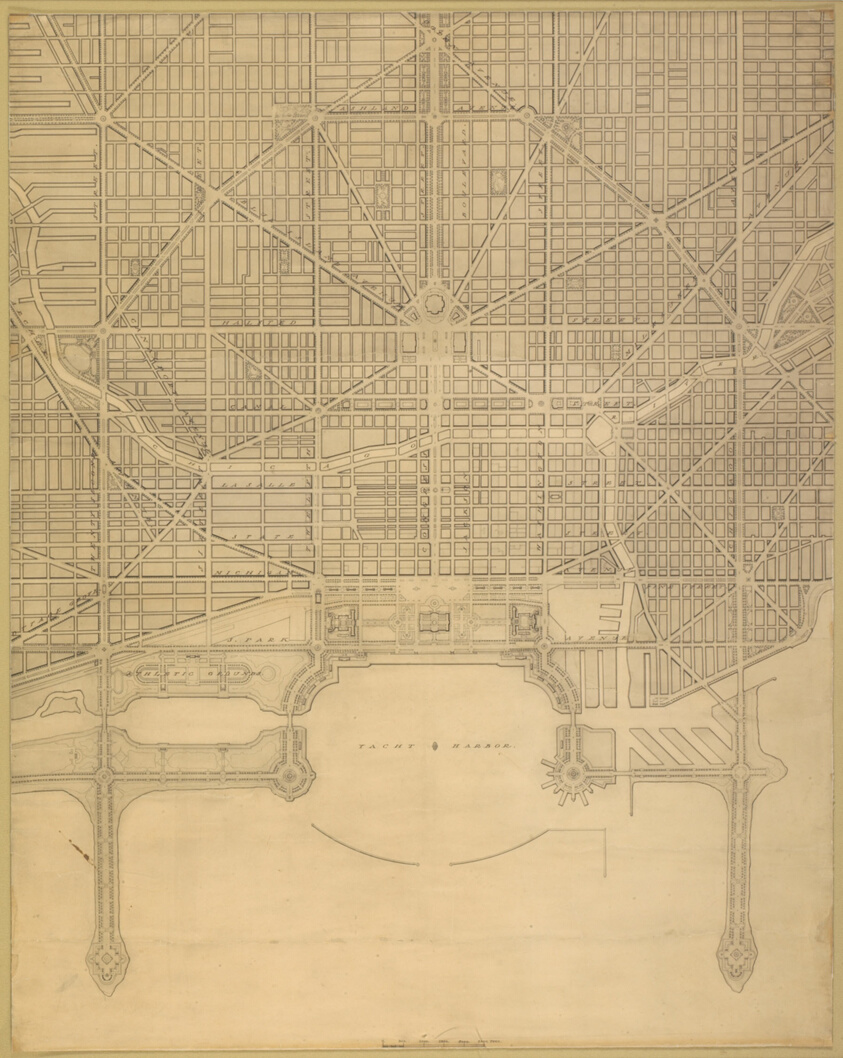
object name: Architectural Drawing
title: Plate 110 from The Plan of Chicago, 1909: Chicago. Plan of the Complete System of Street Circulation; Railway Stations; Parks, Boulevard Circuits and Radial Arteries; Public Recreation Piers, Yacht Harbor, and Pleasure-Boat Piers; Treatment of Grant Park; the Main Axis and the Civic Center, Presenting the City as a Complete Organism in which All its Functions are Related One to Another in such a Manner that it will Become a Unit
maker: Daniel Hudson Burnham, American, 1846-1912; Edward Herbert Bennett, American, born England, 1874-1954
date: 1909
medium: Ink and wash on paper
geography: Chicago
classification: ink; architectural drawing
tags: Chicago, architecture, city, drawing, functional design, harbor pier, illinois, lake, street, urban planning